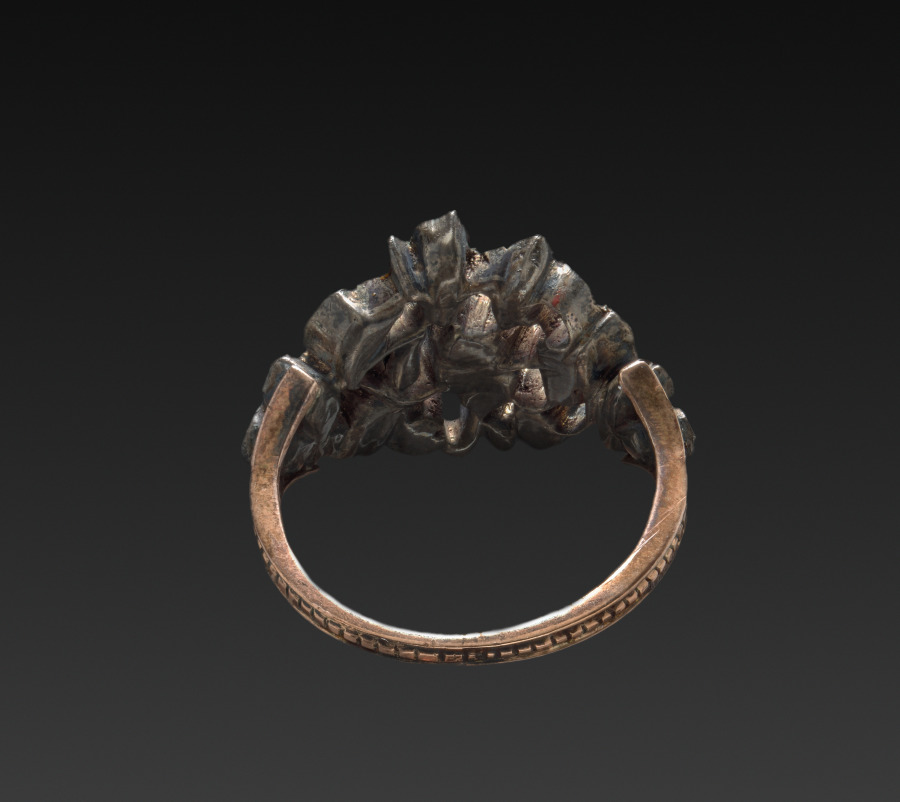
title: Ring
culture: Italy or France, 18th century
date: 1700s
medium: gold band, silver setting with rubies, diamonds, opal, emerald and garnet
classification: Jewelry